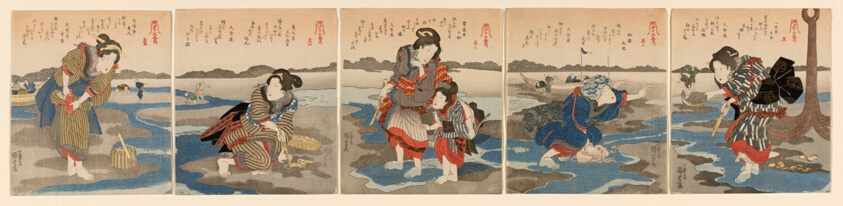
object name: Print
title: Low Tide at Susaki - A Set of Five (Shiohi goban no uchi)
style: Japanese (culture or style)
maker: Utagawa Kuniyoshi (Japanese, 1797–1861)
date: c. 1828/30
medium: Color woodblock prints; shikishiban pentaptych, surimono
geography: Japan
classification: print; asian art